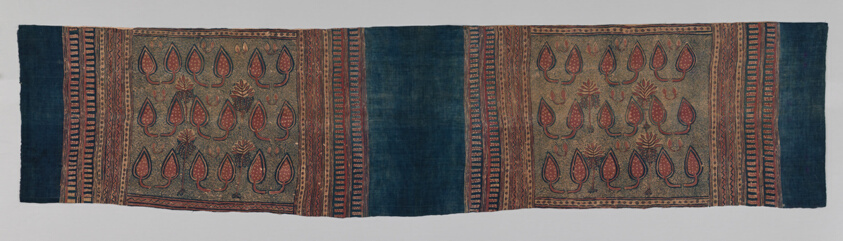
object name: Textile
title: Heirloom Textile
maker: India, Gujarat; Found in the Toraja area of Sulawesi, Indonesia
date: 17th century (?)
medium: Cotton, plain weave; block printed and resist dyed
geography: India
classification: textile; weaving - printed; weaving